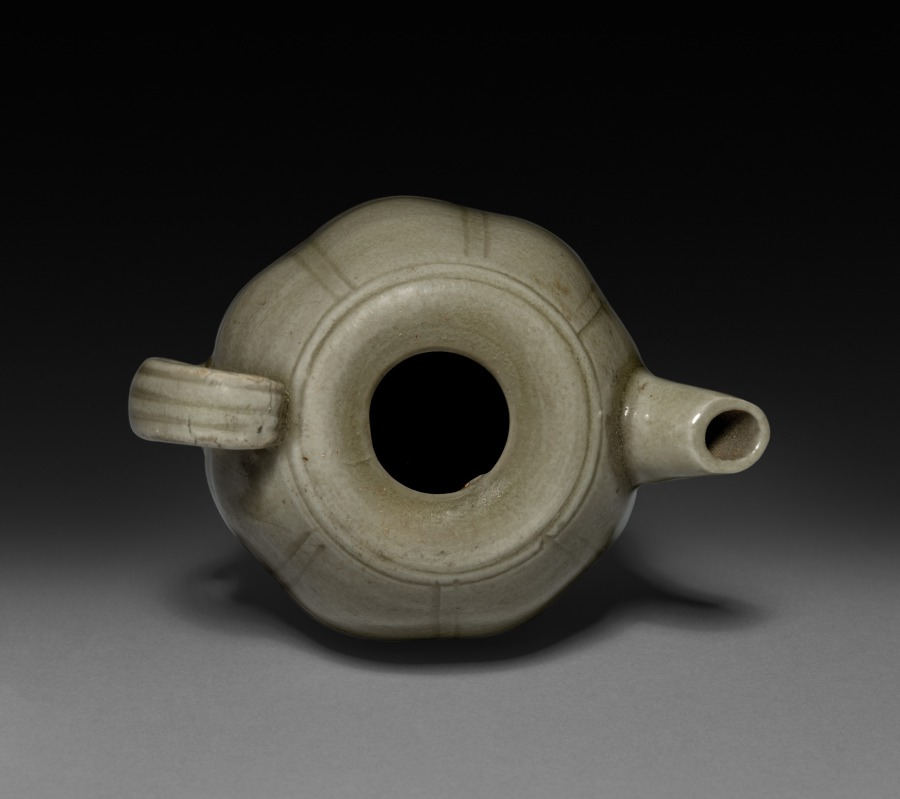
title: Wine Pot: Southern Celadon Ware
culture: China, Southern Song Dynasty (1127-1279) - Yuan Dynasty (1271-1368)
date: 1200s-1300s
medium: glazed porcelain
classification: Ceramic